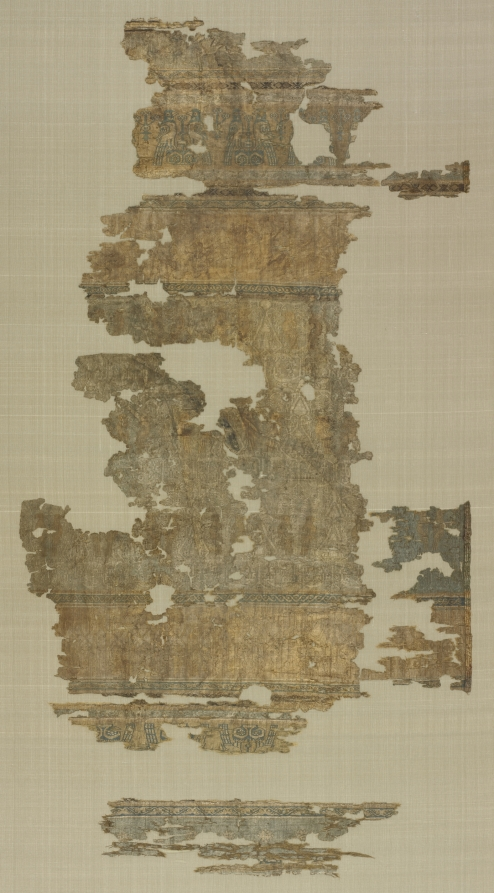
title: Silk fragments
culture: Syria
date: 1000s-1100s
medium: samite: silk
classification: Textile